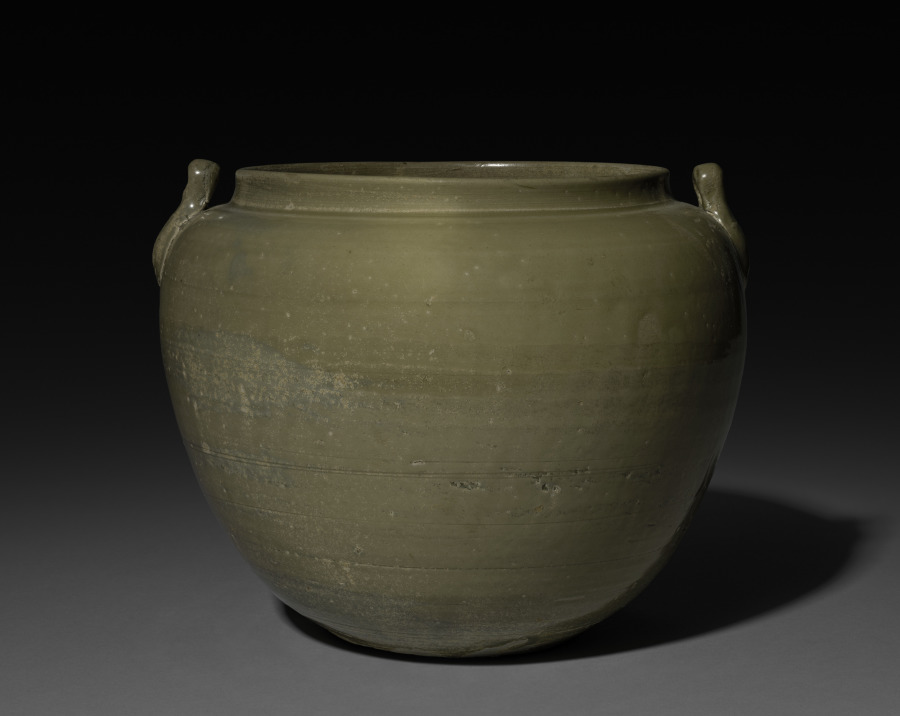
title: Jar with Handles: Yue ware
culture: China, Tang dynasty (618-907)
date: c. 800s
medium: gray stoneware with iron glaze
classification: Ceramic